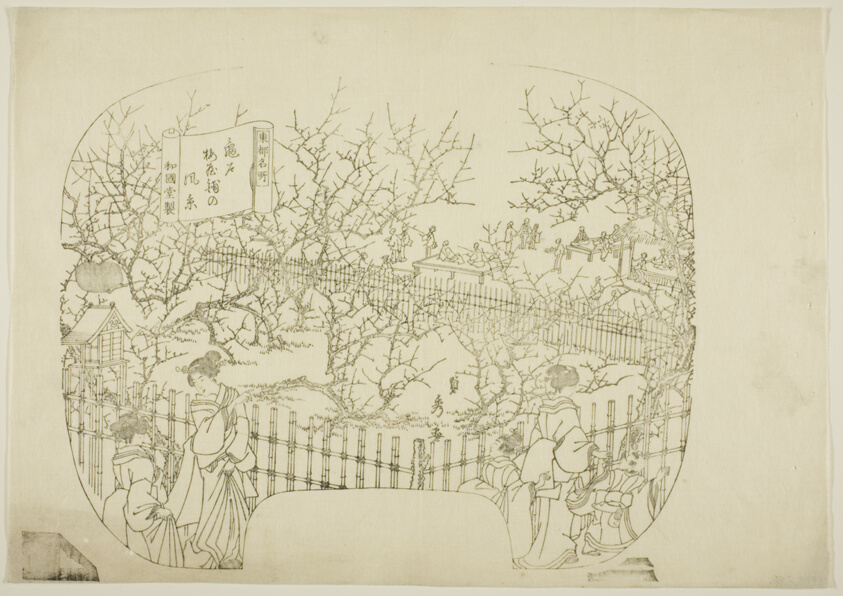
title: Key block for a print from the series "Toto meisho" (Famous Views of the Eastern Capital)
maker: Utagawa Sadahide (Japanese, 1807-1873)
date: undated (c. 1850s)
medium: Color woodblock print, ôban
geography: Japan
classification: woodblock print; print; asian art